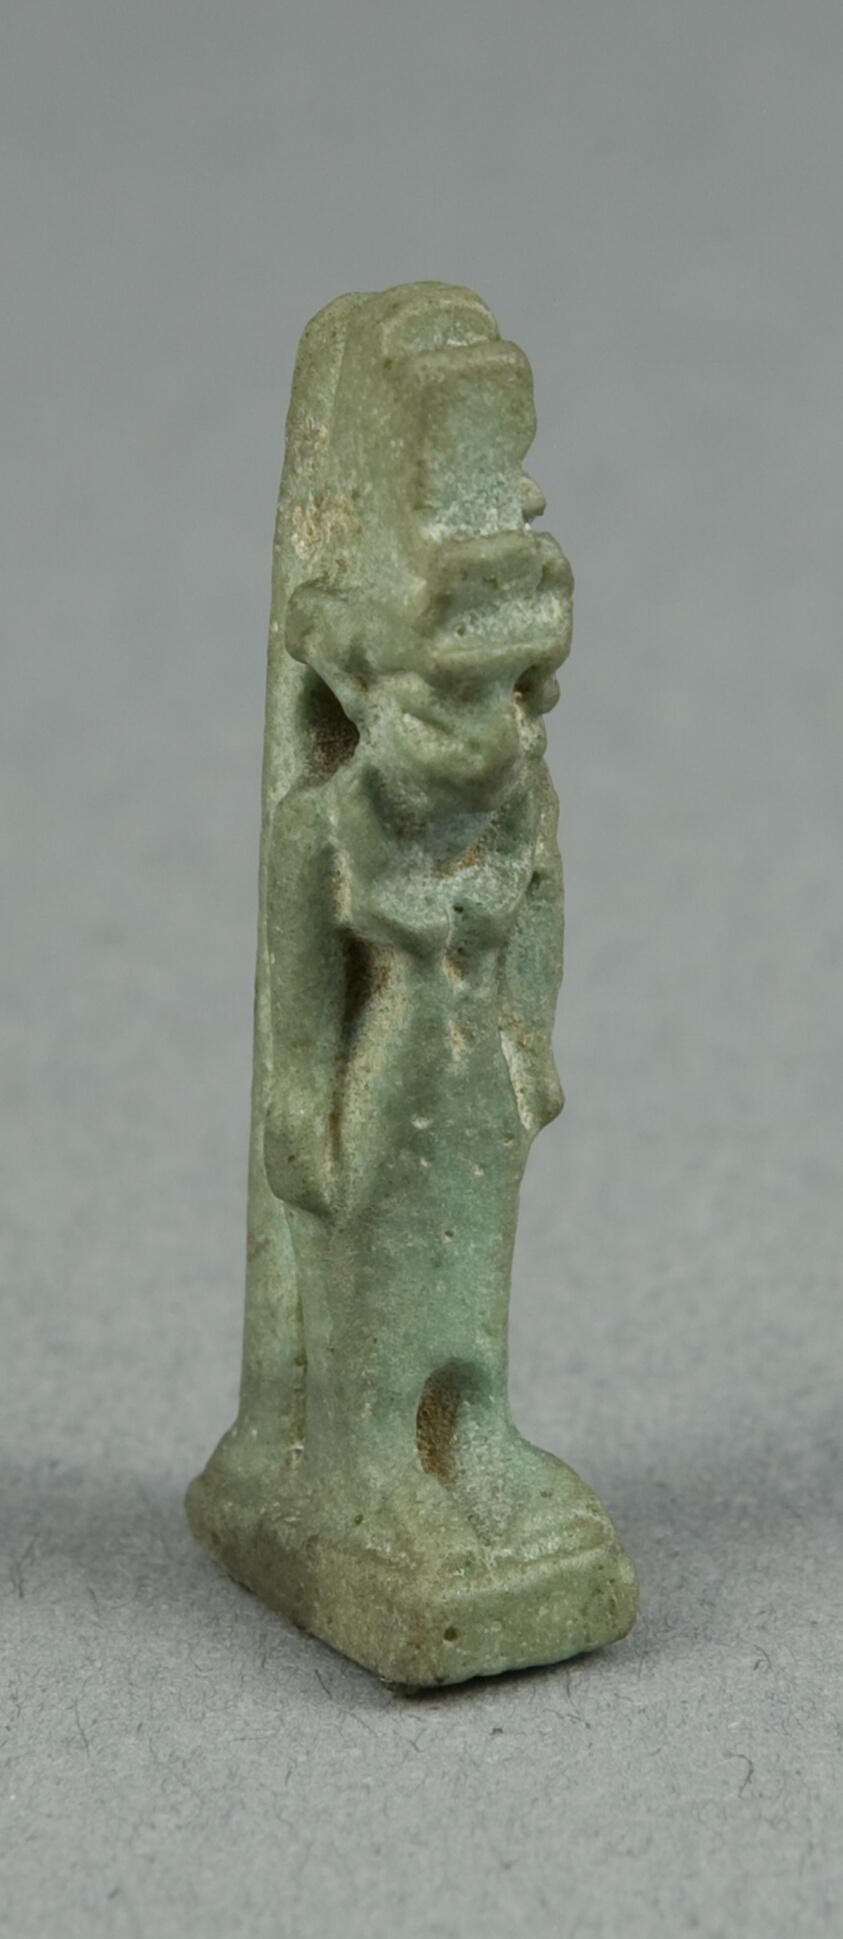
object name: Costume and Accessories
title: Amulet of the Goddess Isis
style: egyptian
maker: Egyptian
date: Ptolemaic Period (?) (332–30 BCE)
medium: Faience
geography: Egypt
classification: amulet; jewelry; ceramics; ancient art; costume; faïence (composite material)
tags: goddesses